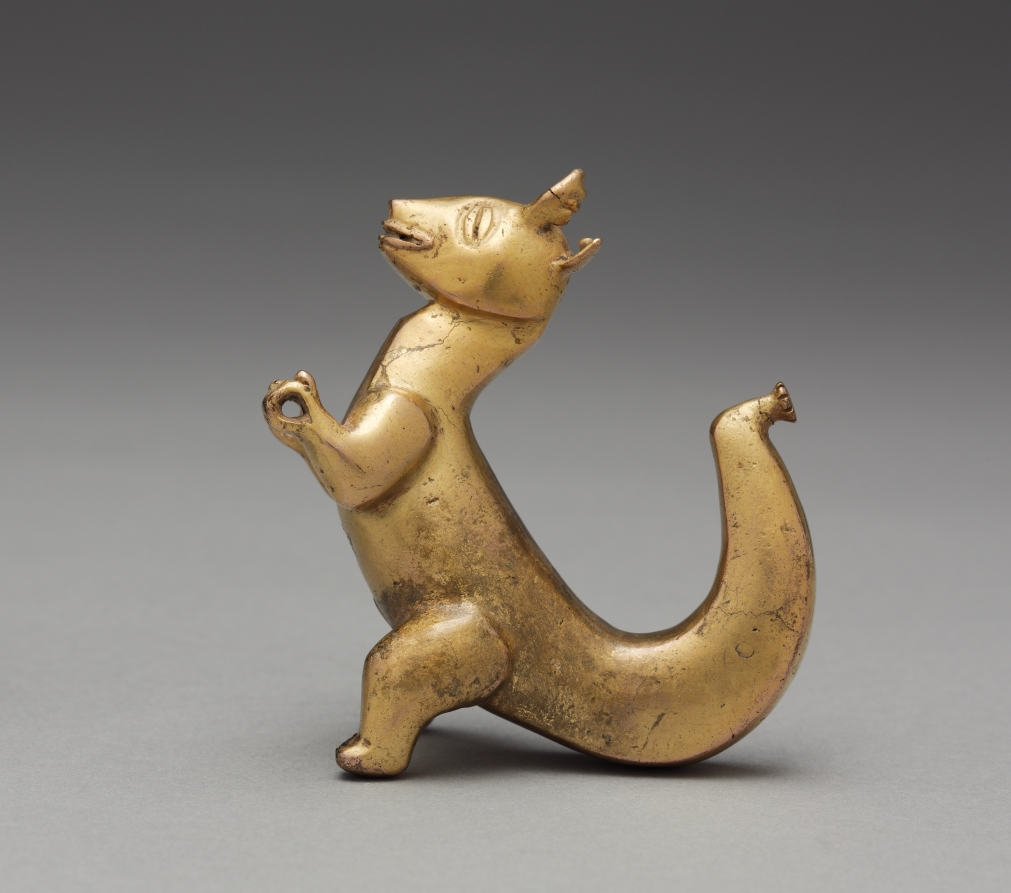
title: Pendant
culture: Panama, International style, 5th-7th century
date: 400–700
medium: cast gold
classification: Metalwork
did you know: Panning for gold was viewed as a sacred activity among the ancient inhabitants of Costa Rica and Panama.